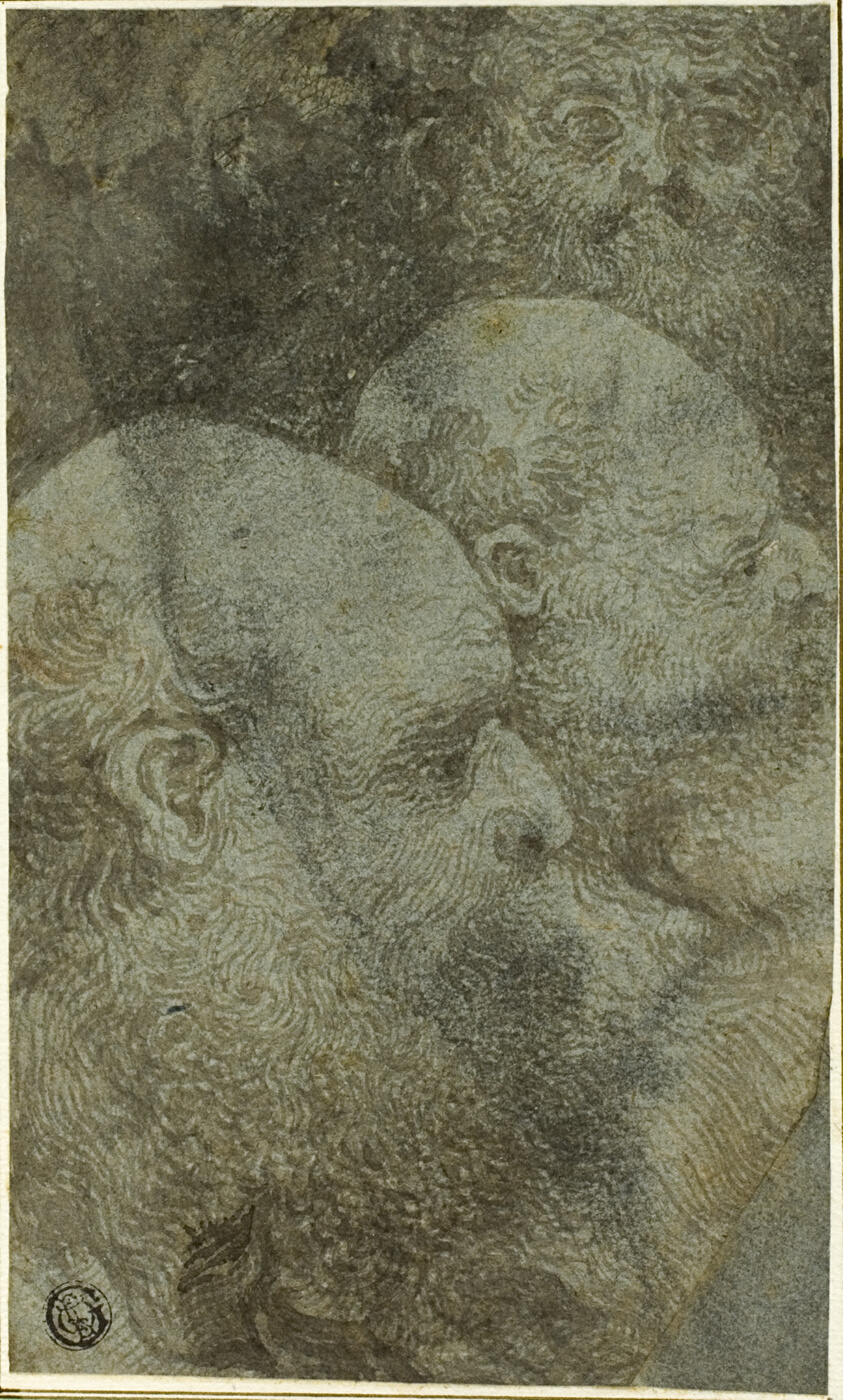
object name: Drawing and Watercolor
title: Three Bearded Male Heads, Two in Profile to the Right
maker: Circle of Bernardino Lanino (Italian, c. 1509- after 1581)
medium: Brush and gray-brown ink and wash, on blue laid paper, laid down on ivory laid paper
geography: Italy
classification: ink and wash; drawings (visual works); prints and drawing